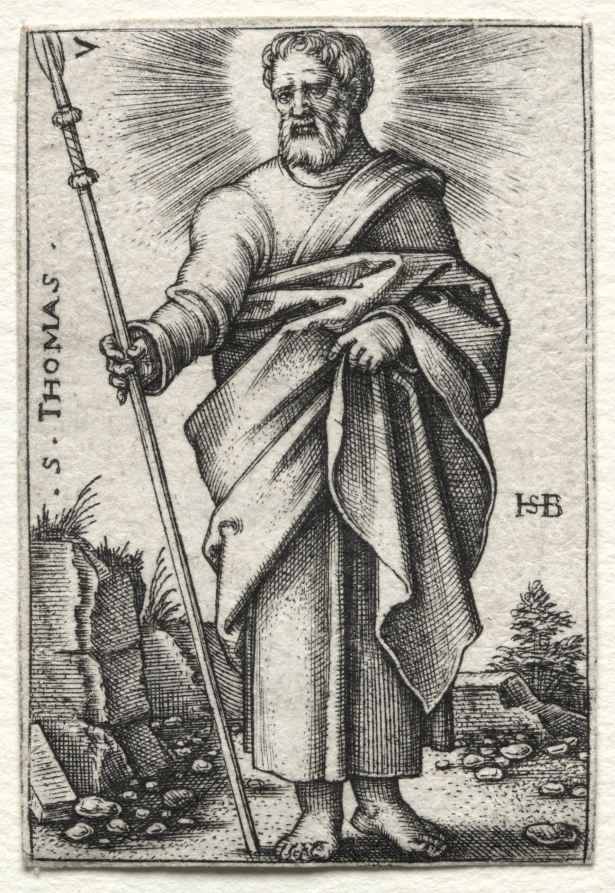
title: St. Thomas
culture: Germany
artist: Hans Sebald Beham (German, 1500–1550)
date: 1545–1546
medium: engraving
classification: Print